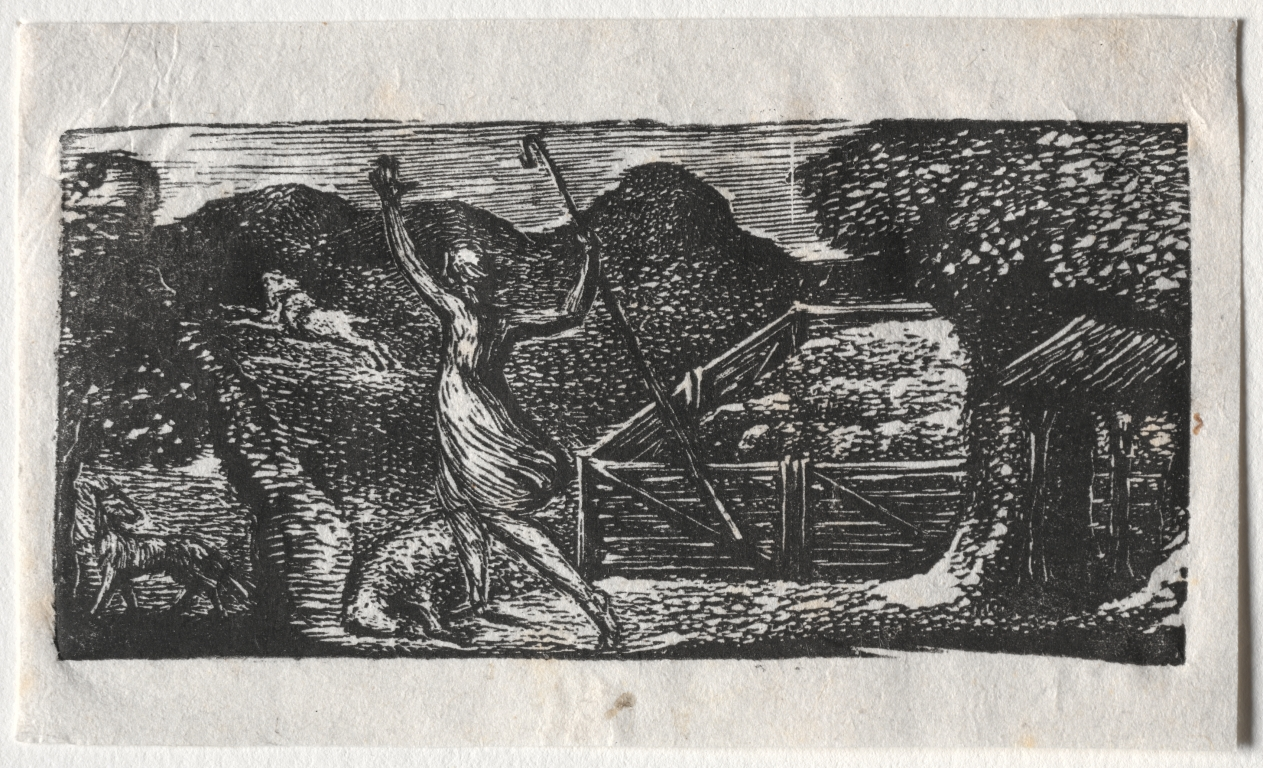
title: The Pastorals of Virgil, Eclogue I: The Shepherd Chases away a Wolf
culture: England, 19th century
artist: William Blake (British, 1757–1827)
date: 1821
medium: wood engraving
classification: Print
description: William Blake conceived and engraved 17 designs for Dr. Robert John Thornton’s The Pastorals of Virgil, a popular schoolbook used in teaching Latin. The publication included translations of poems by ancient Roman author Virgil that focus on a rural setting as both a subject matter and as the background for discussions of various issues, from love to politics. Blake’s illustrations reveal his emphasis on the natural world. As his only wood engravings, they also show how the process entails cutting away from the woodblock to create lighter sections, in essence working in white over a black background. Here, several areas—such as the textures of the trees—emphasize that point.